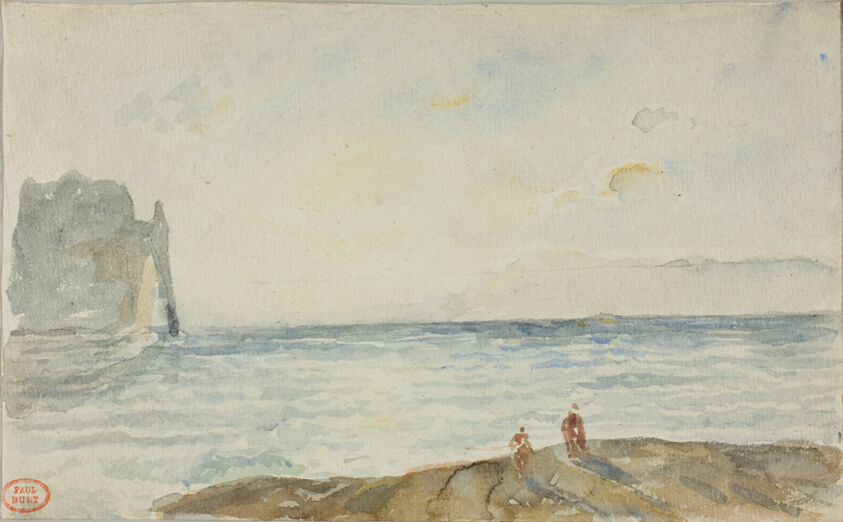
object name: Drawing and Watercolor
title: View at Étretat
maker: Paul Huet (French, 1803-1869)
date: c. 1827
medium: Watercolor on cream laid paper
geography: France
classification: watercolor; drawings (visual works); prints and drawing